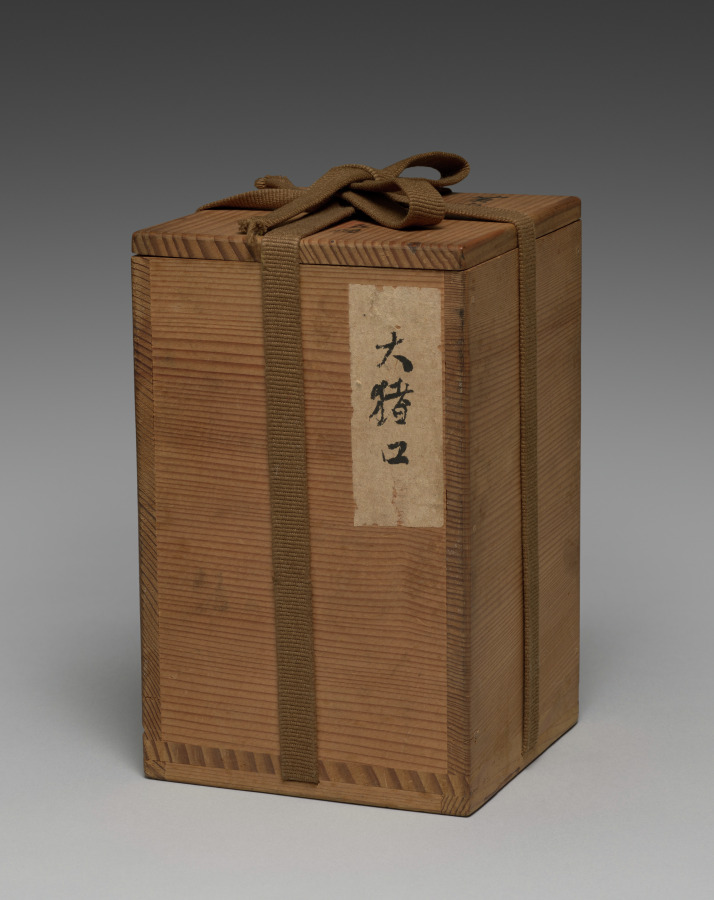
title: Cups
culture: Japan, Taishō period (1912–26) or Shōwa period (1926–89)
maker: Seifū Yohei IV (Japanese, 1872–1951)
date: 1914–46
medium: Set of five cups; porcelain with yellow glaze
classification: Ceramic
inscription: 清風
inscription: 清風造 【印】成山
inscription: 清風盧人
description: Like his father, Yohei IV also produced works with red or yellow monochrome glazes. His yellow-glazed works include this set of five drinking cups, a pair of sake pourers CMA 2022.216, and a sweets bowl molded into the shape of a chrysanthemum CMA 2022.218.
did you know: Seifū Yohei IV learned the ceramics industry from his father and painting from Tanomura Shosai.